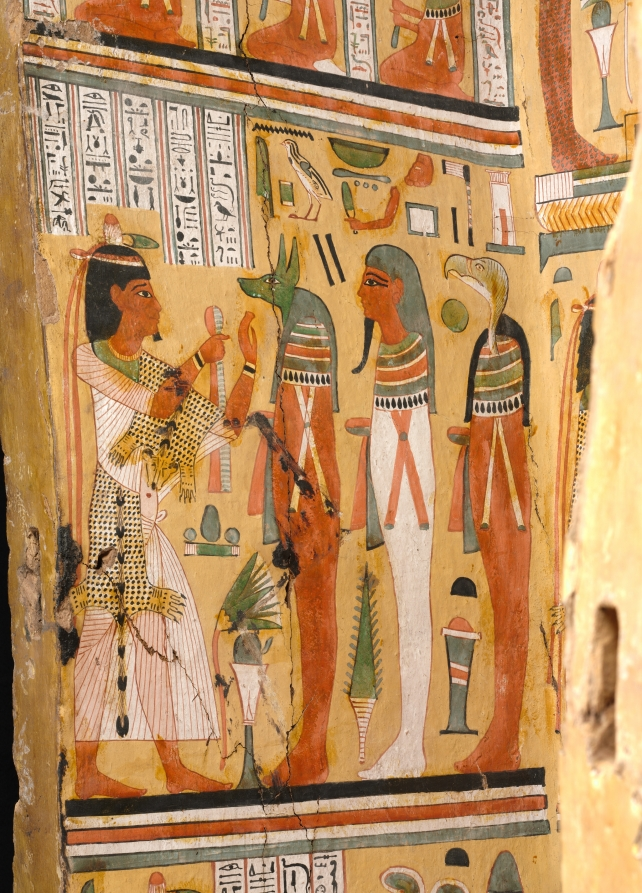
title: Coffin of Nesykhonsu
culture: Egypt, Thebes, Third Intermediate (1069–715 BCE), Dynasties 21–22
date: c. 976–889 BCE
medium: gessoed and painted sycamore fig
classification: Funerary Equipment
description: Egyptian coffins told stories and illustrated spells to help the deceased transition safely to the afterlife. Inside Nesykhonsu's coffin there are two jackals, one facing right and the other left, near the top. Here, the jackal represents the powerful deity Anubis, the god of the afterlife and embalming.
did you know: Two of Nesykhonsu's titles, "Lady of the House" and "Singer of the Choir of Mut the Great," are written on the outside of the coffin.